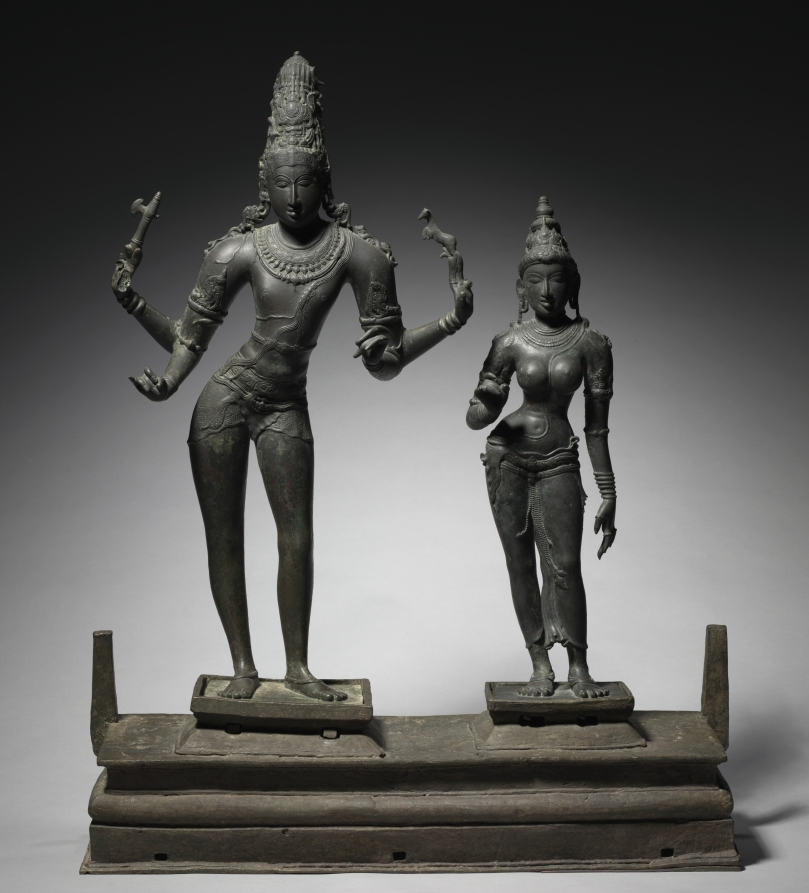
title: Shiva and Parvati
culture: South India, Tamil Nadu, Chola period (900–1200s))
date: c. 950–60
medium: bronze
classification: Sculpture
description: Bronze sculptures made during the Chola period (800s–1200s) are among the most celebrated and popular art forms of the Indian tradition, and the 10th century marks their flourishing peak. The sensual renditions of attenuated, youthful, and athletic forms are barely covered by garments and ornaments that move, yet cling to the bodies. The figures stand with a natural ease, and the volumes have been so skillfully rendered by the artists that they appear to be capable of walking the earth. Their serene and smiling expressions are completely idealized, leaving no mistake that these are gods, not humans.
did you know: The posts on the sides of the pedestal once supported a halo that surrounded both figures.